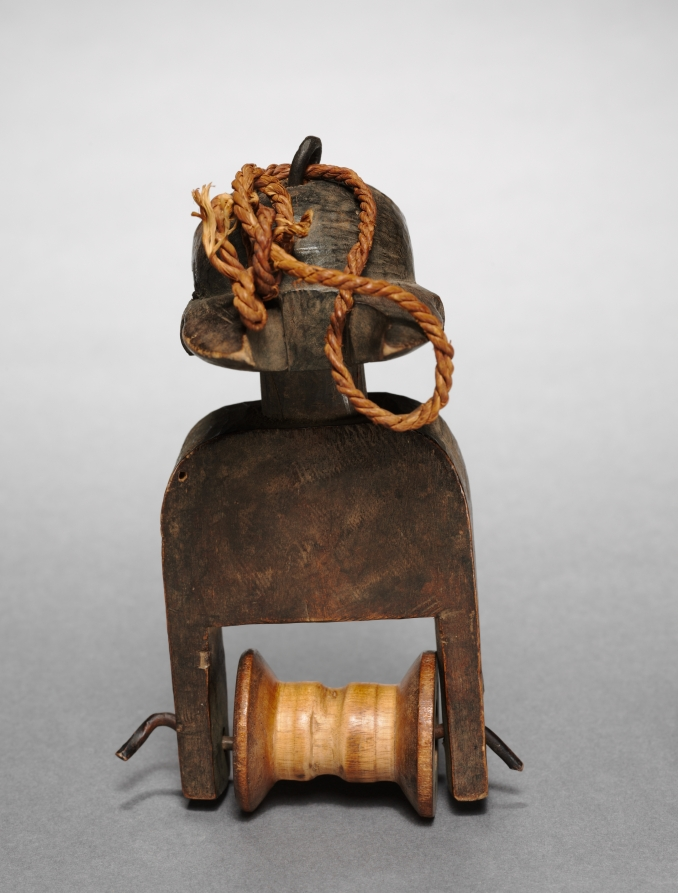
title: Heddle Pulley (Bo Nun Amuin mask)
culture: Africa, West Africa, Côte d’Ivoire, Baule-style carver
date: 1900s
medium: Wood, metal, and plant fiber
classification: Implements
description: The heddle pulley, a working element of a narrow-band loom, bears a miniature sculpture. Heddle pulleys support and separate threads during weaving. Mounted above the weaver, the pulleys allow him to glance up at an object of inspiring beauty, rather than pure functionality. This pulley depicts a face mask, a secular usage of a typically sacred mask type.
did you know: This heddle pulley depicts a fearsome Bo Nun Amuin mask that recalls nature spirits.